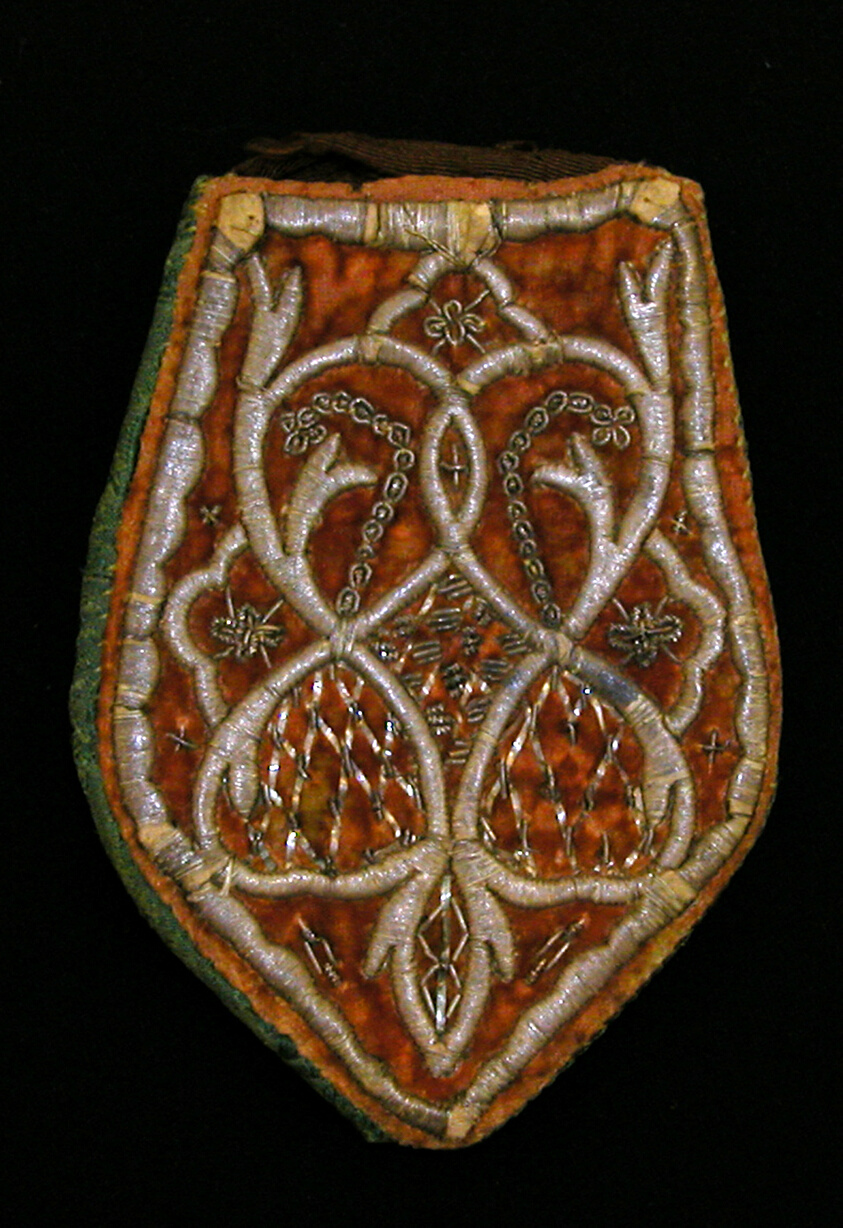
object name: Costume and Accessories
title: Bag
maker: France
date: 1680/1700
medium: Silk, plain weave with supplementary pile warps forming cut solid velvet; embroidered with gilt-metal-strip-wrapped silk laid over padding, silk-wrapped metal purl, and gilt-metal purl in bullion; gusset: silk, plain weave with supplementary patterning wefts; lining: silk, plain weave; interlining: linen, plain weave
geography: France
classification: textile; bag - needlework; costume accessory - bag; costume accessory; costume